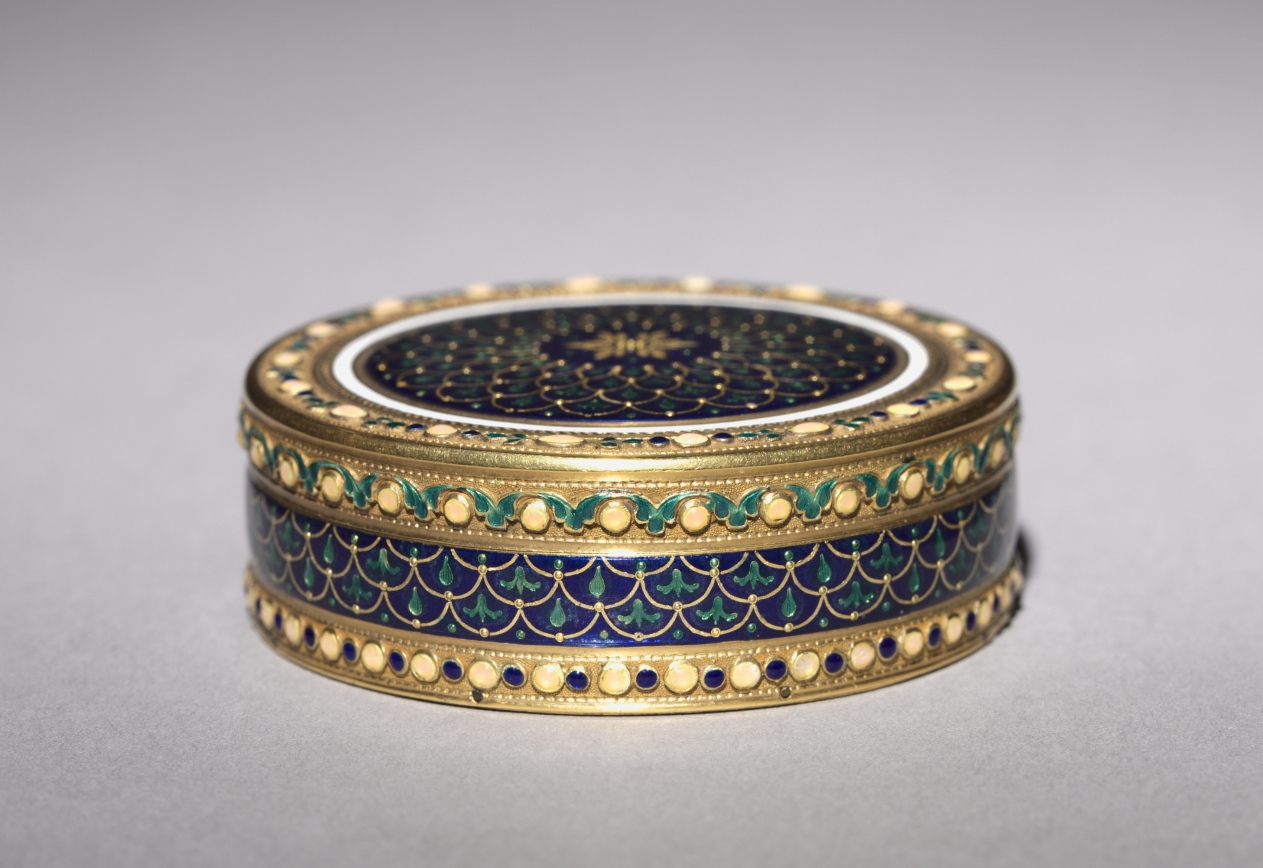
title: Powder Box (Poudrier)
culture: France, 18th century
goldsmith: Jean-Joseph Barrière (French)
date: 1779–80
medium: enamel on gold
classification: Miscellaneous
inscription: [Maker's mark of Jean-Joseph Barrière, master goldsmith in 1763, bottom; exterior wall; inside cover]: "JJB"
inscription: [Warden's mark for Paris, 1779-1780, exterior wall]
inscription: [Discharge mark of Henry Clavel I, Paris, 1780-1782, exterior wall]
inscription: [Counter-mark of Henry Clavel I and Jean-Francois Kalendrin, Paris,1782-1789, exterior wall]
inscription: [Restricted warranty mark for gold, Paris, exterior wall]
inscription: [Three illegible marks, bottom]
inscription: [Three illegible marks, cover]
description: In the 1700s ornately enameled boxes became a popular accessory in the French court. These boxes often held powdered tobacco, called snuff. However, this box, which is unhinged, likely held powder, rouge, or face cream. Pageantry and performance were important aspects of social interaction during this period. The extravagant designs and associated functions of these boxes communicated social and political status.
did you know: Jean-Joseph Barrière received his designation of master goldsmith in 1763, a coveted title that required candidates to complete a lengthy apprenticeship followed by a test of skill.